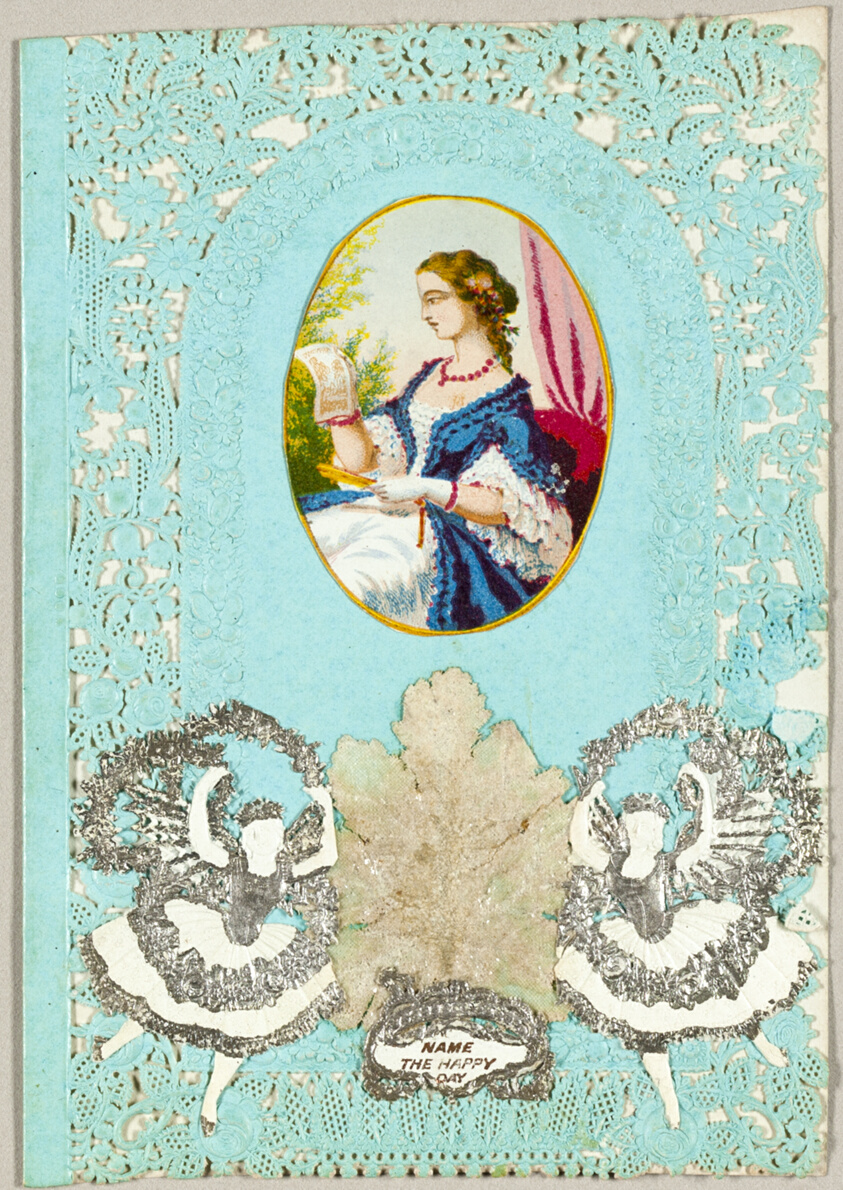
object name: Drawing and Watercolor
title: Name the Happy Day (valentine)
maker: Thomas Wood (English, 19th century)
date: c. 1864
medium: Collaged elements on cut and embossed (lace) blue wove paper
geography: England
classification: collage; valentine; prints and drawing; paper